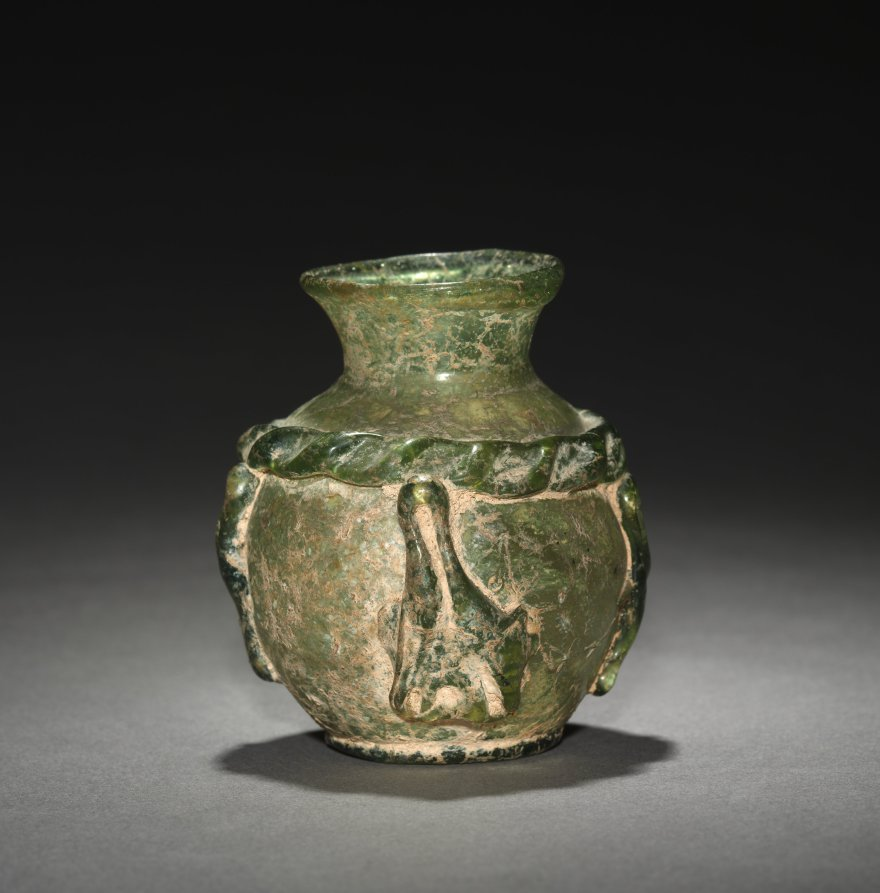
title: Vase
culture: Early Islamic, Eastern Mediterranean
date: 600s–800s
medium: glass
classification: Glass